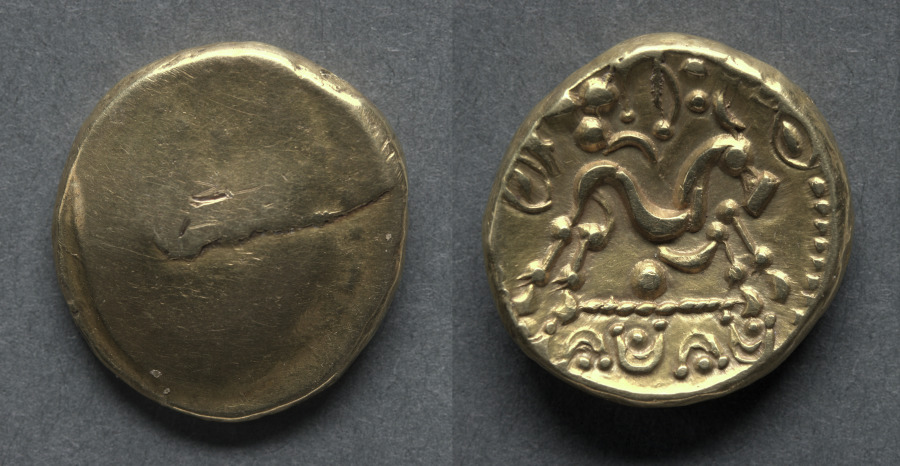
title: Stater: Plain (obverse); Horse (reverse)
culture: England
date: c. 57–45 BCE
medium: gold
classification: Coins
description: Julius Caesar recorded that in the year 57 BC, chieftains who had unsuccessfully resisted him in Gaul took refuge in Britain. This wave of refugees brought with them, and probably also struck in Britain, the staters known as the Gallo-Belgic type (this specific one is known as the Morini type). There is no sign of any part of an obverse design and the horse, now detached from the chariot, has become extremely crude in design. The minting technique however, is good as the design is clear-cut and sharp.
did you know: When struck this coin became concave, curving inward.